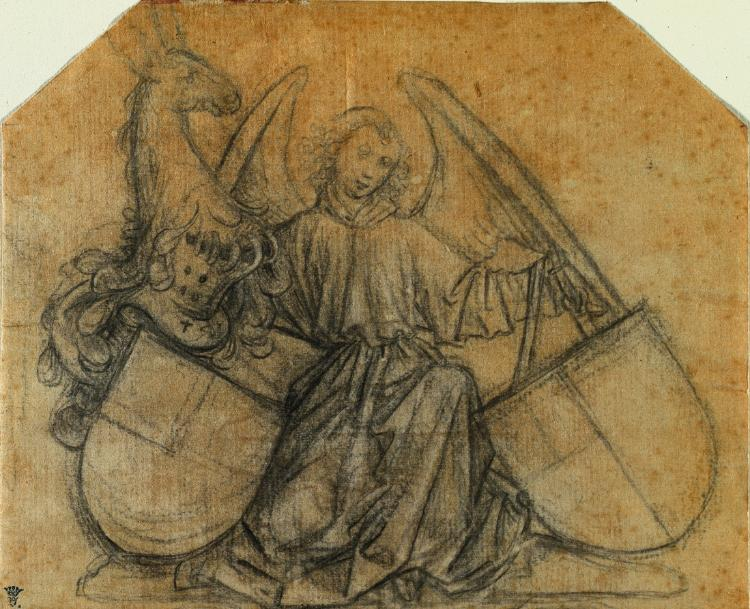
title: An Angel Supporting Two Escutcheons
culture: Germany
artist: attributed to Nikolaus Gerhaert von Leyden (German)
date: c. 1470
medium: black chalk or charcoal; framing lines in red pencil and graphite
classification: Drawing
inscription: VERSO, right half, in graphite: [margin in white?] [illegible] [sideways]